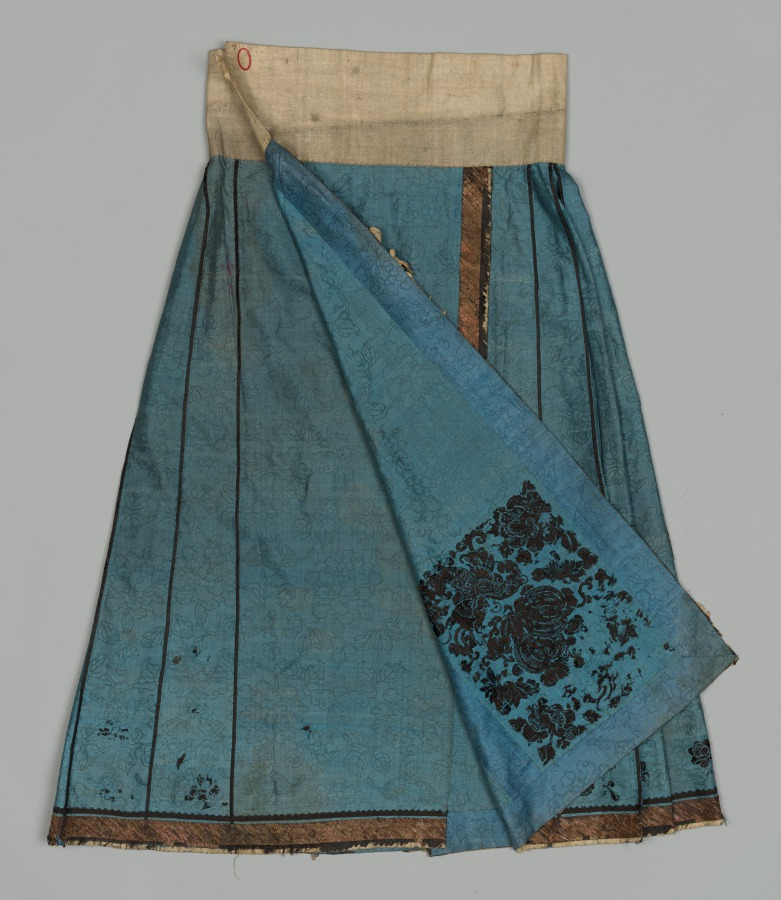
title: Skirt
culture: China, early 20th century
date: early 1900s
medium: satin weave silk (blue) with metal thread embroidery; plain weave cotton ? waistband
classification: Garment